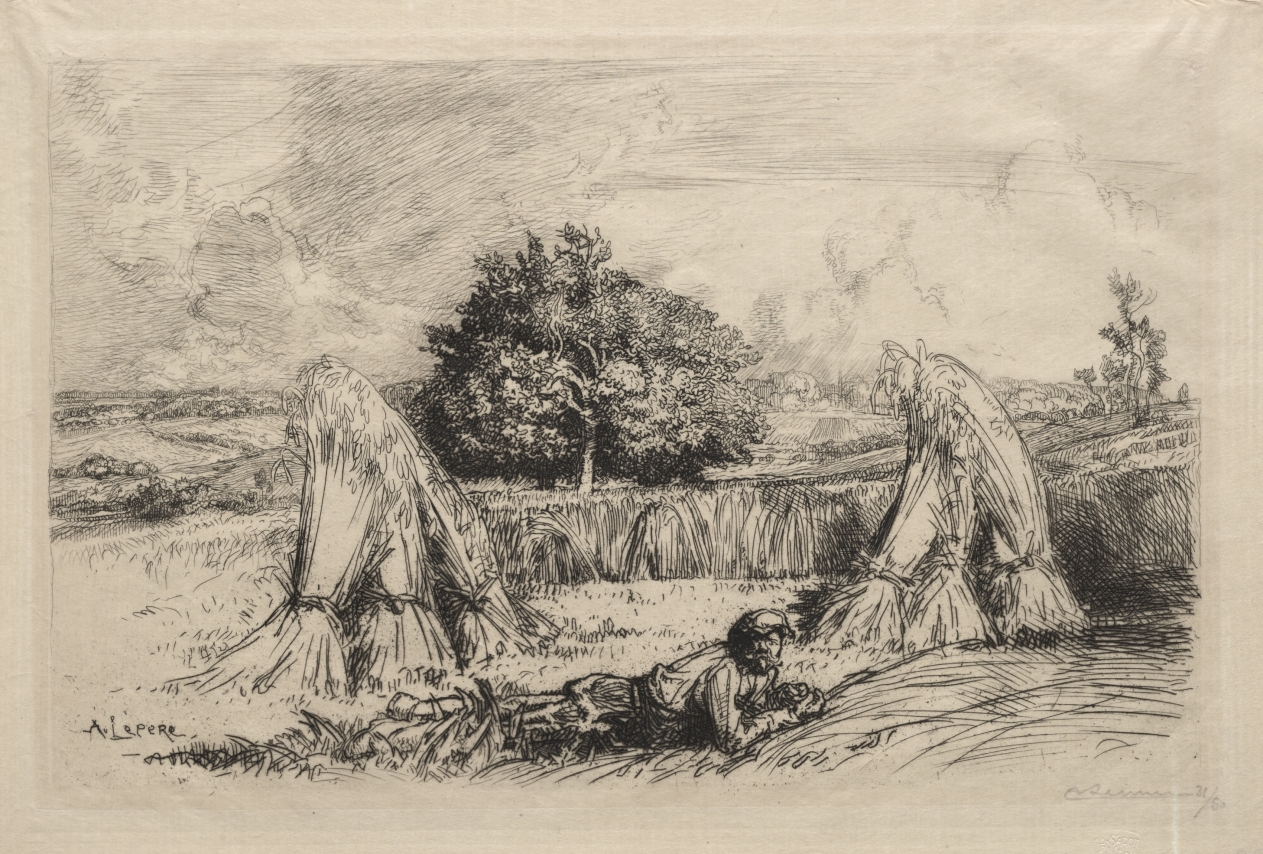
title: Javelles de Seigle, Crèvecoeur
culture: France, 20th century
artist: Auguste Louis Lepère (French, 1849–1918)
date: 1915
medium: etching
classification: Print